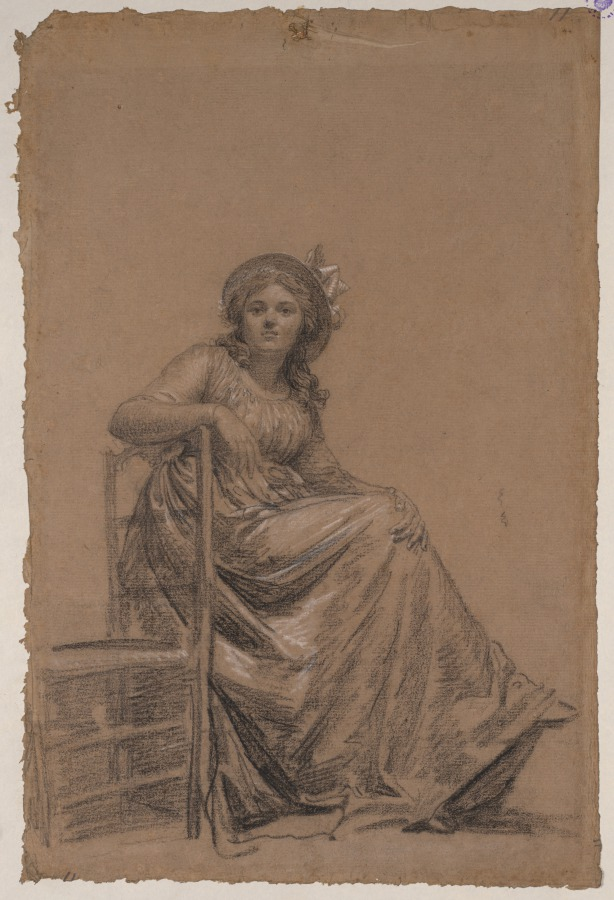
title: Portrait of a Seated Woman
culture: France, 18th century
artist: circle of François-André Vincent (French, 1746–1816)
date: 18th-19th century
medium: Black chalk heightened with white chalk on brown paper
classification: Drawing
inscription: on mount: upper right, in graphite: 14 (inscribed in circle)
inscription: verso of mount: lower left edge, black stamp with ROYAL place above crown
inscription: mount: upper right, German customs stamp in purple: encircled Zollamt So[?]at with coat of arms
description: This drawing, presumably a study for a painted portrait, depicts a seated woman, dressed in a long gown and fashionable hat. Her casual pose, with one hand placed nonchalantly on her knee, her right elbow resting on the back of a chair, and a gaze unfocused on something outside the scene, gives the image an intimate informality.